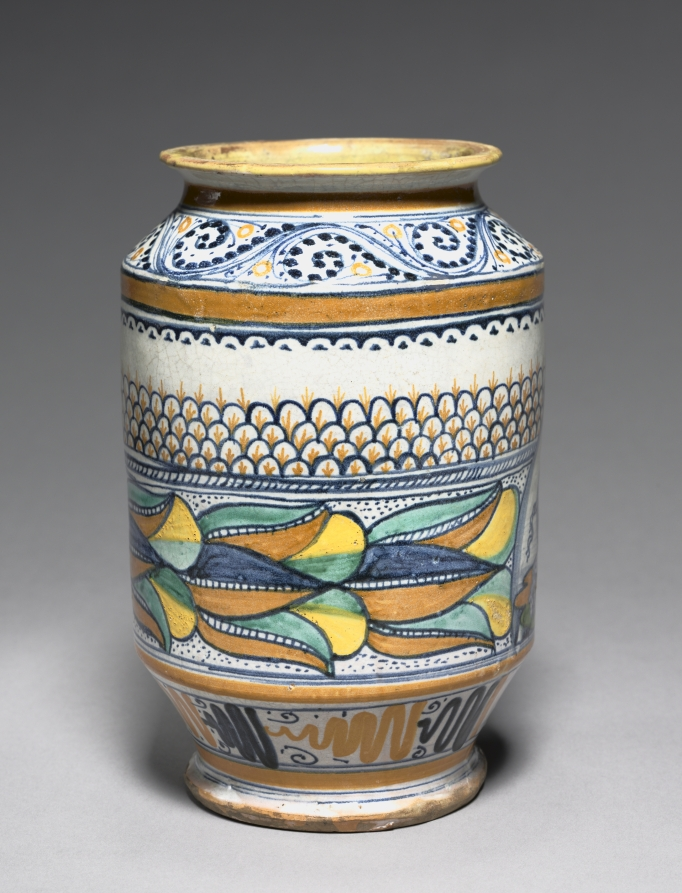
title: Pharmacy Jar (Albarello)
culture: Italy, Siena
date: c. 1510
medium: tin-glazed earthenware (maiolica)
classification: Ceramic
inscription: located above foot of jar: DIA-IRIS.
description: Storage jars that lined the shelves of Renaissance pharmacies often held medicinal herbs, spices, and ointments. Their shape made them easy to grasp while the flared lip allowed apothecaries to seal off the contents with parchment or cloth secured by a string. This particular storage jar depicts a child riding a wild boar.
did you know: The scroll along the bottom reads DIA IRIS, indicating that it may have once held a medicinal iris compound.